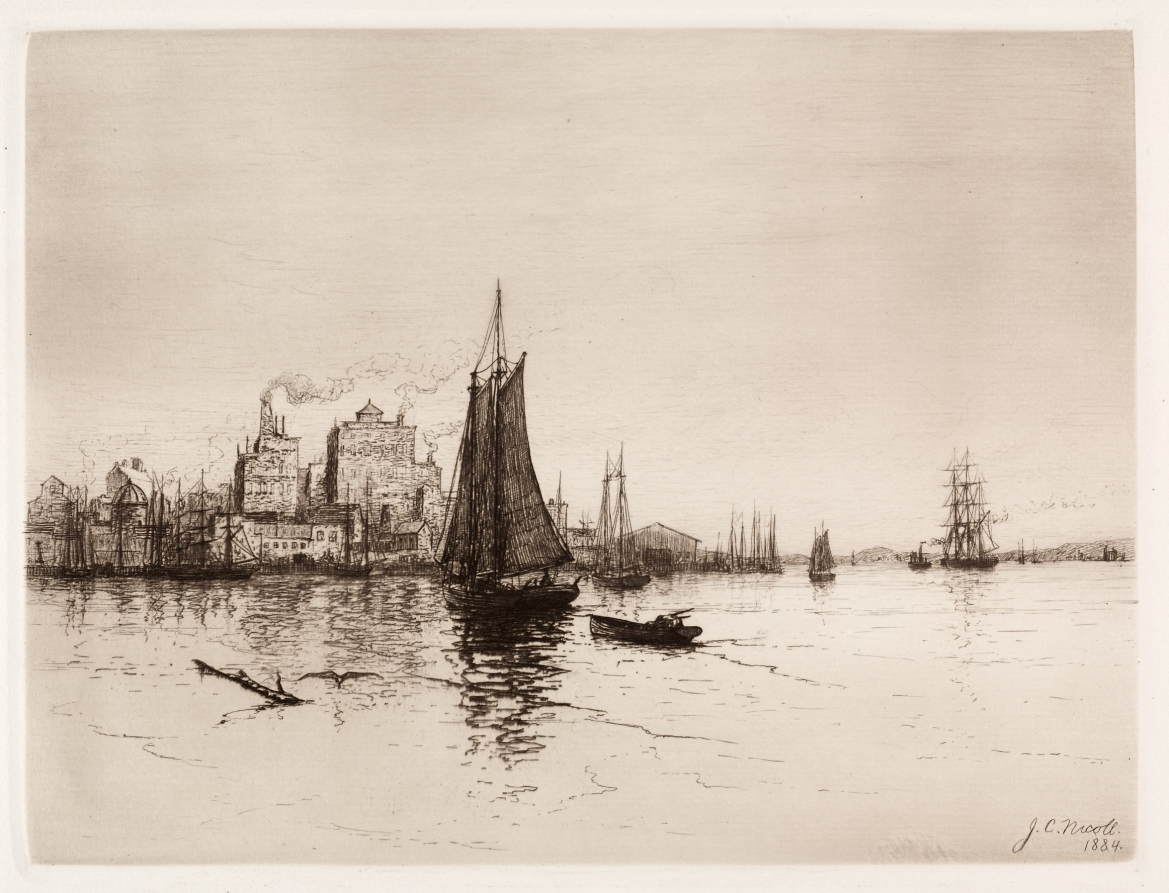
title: Harbor Scene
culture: America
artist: James Craig Nicoll (American, 1847–1918)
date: 1884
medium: etching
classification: Print